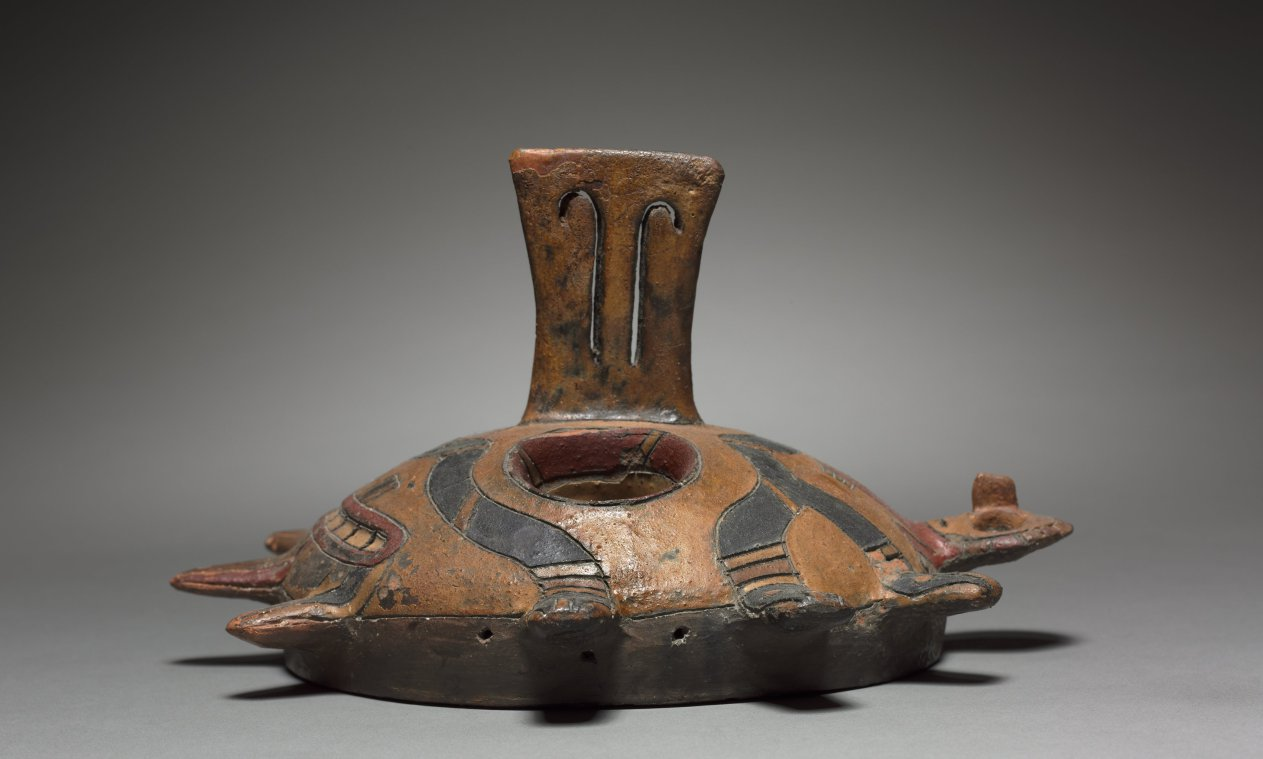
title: Oculate Being Mask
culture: Peru, South Coast, Paracas (Cavernas) style (700 BCE–1 CE)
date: 300 BCE–1 CE (thermoluminescence date, 835 BC–185 CE)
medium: ceramic, resin-based paint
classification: Ceramic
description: This rare mask incarnates a supernatural being who may have been the patron of an early fertility cult on Peru’s south coast. Its traits insinuate power, especially the stuck-out tongue and the serpents that slither over the face to form a halo-like corona. Unexplained are the shape of the nose and the small figure wearing a similar mask. The mask could have served as the face of a mummy bundle or an object; the projecting eyes might rule out use by a living performer.